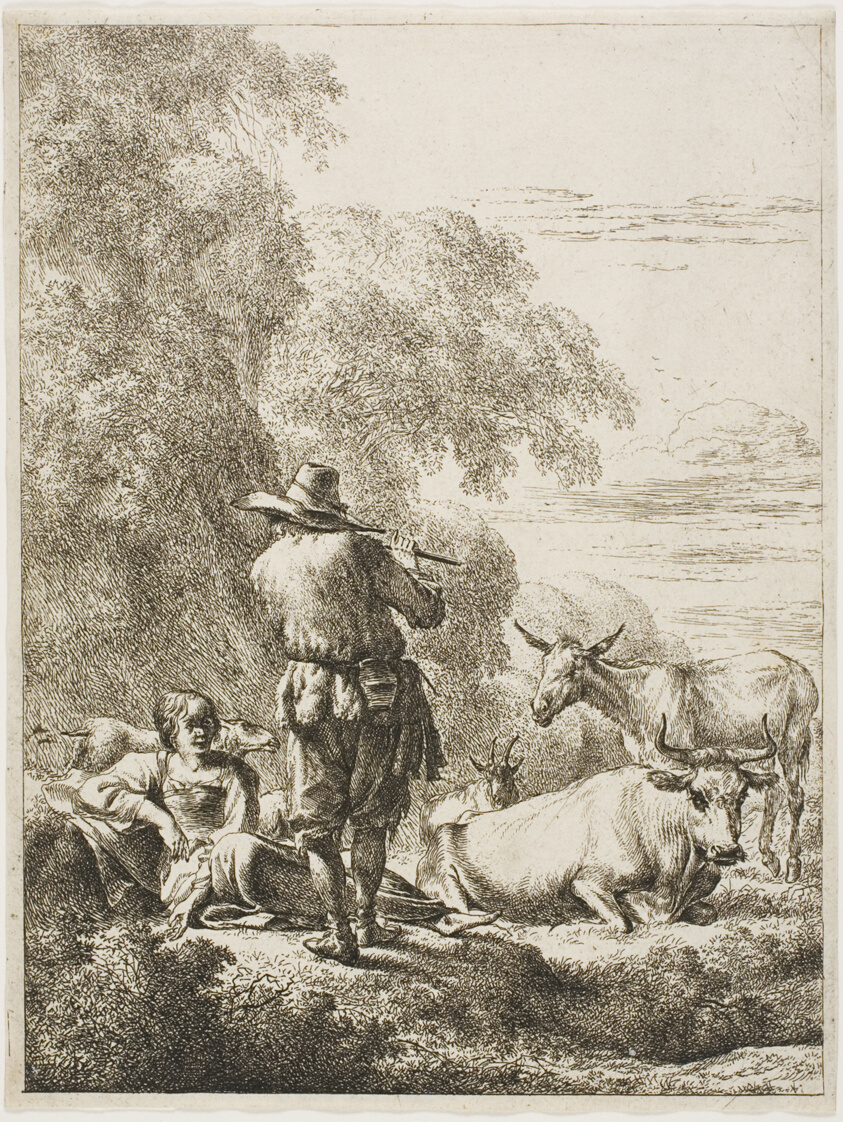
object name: Print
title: Shepherd Playing a Flute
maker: Nicolaes Berchem (Dutch, 1620-1683)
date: 1644/45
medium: Etching in black on cream laid paper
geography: Holland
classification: etching; print; prints and drawing